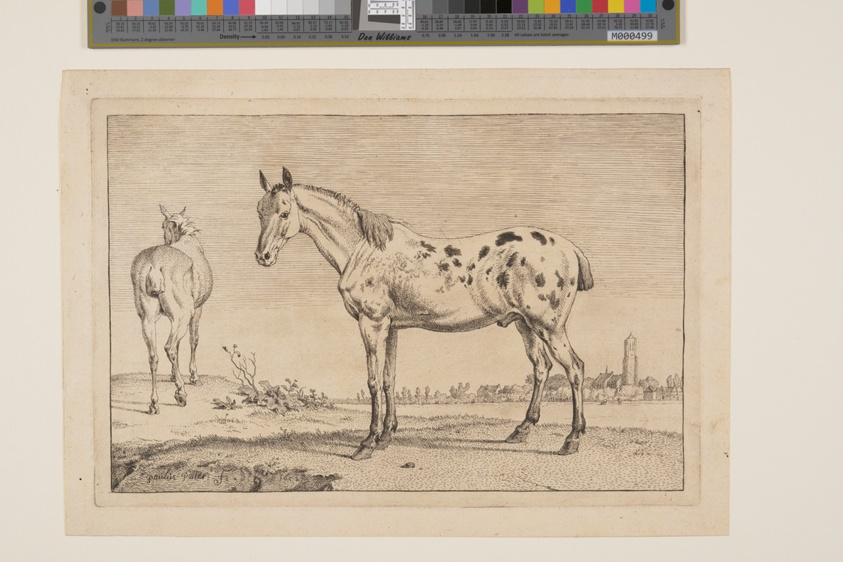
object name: Print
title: The Neighing Horse, from Series of Horses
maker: Paulus Potter (Dutch, 1625–1654)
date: 1652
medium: Etching on ivory laid paper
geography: Netherlands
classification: print; paper; prints and drawing; etching